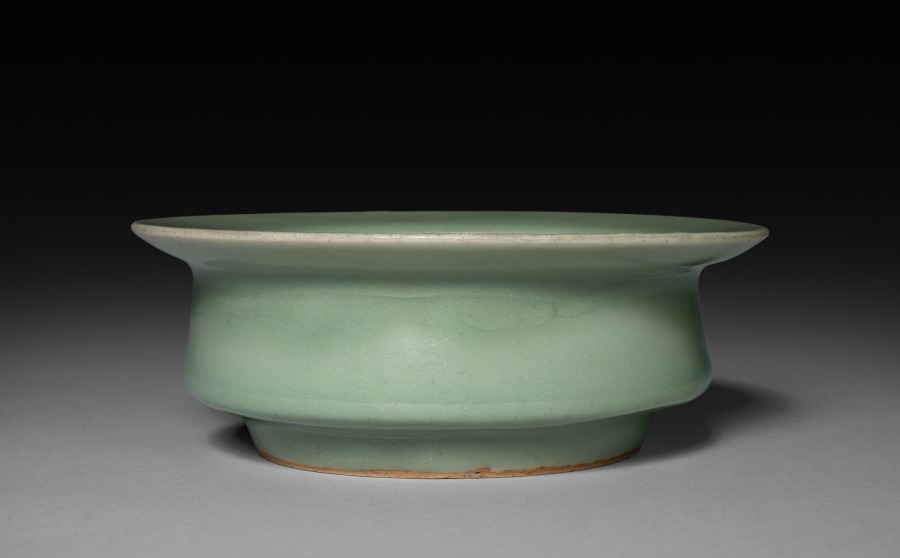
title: Brush Washer: Longquan Ware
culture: China, Southern Song dynasty (1127-1279)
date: 13th Century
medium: glazed porcelain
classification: Ceramic